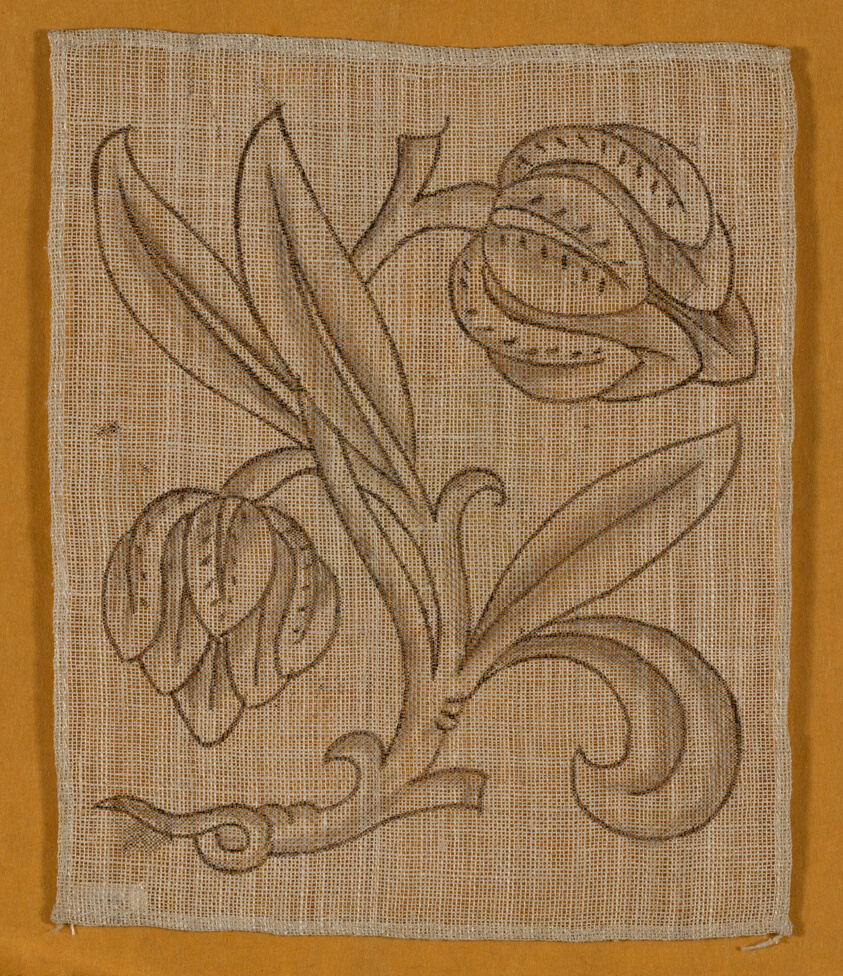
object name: Textile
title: Slip (Unfinished)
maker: England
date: 1590/1640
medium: Linen, plain weave with drawing in pencil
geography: England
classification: textile; patterns (guides); needlework (visual works); accessories (object genre)